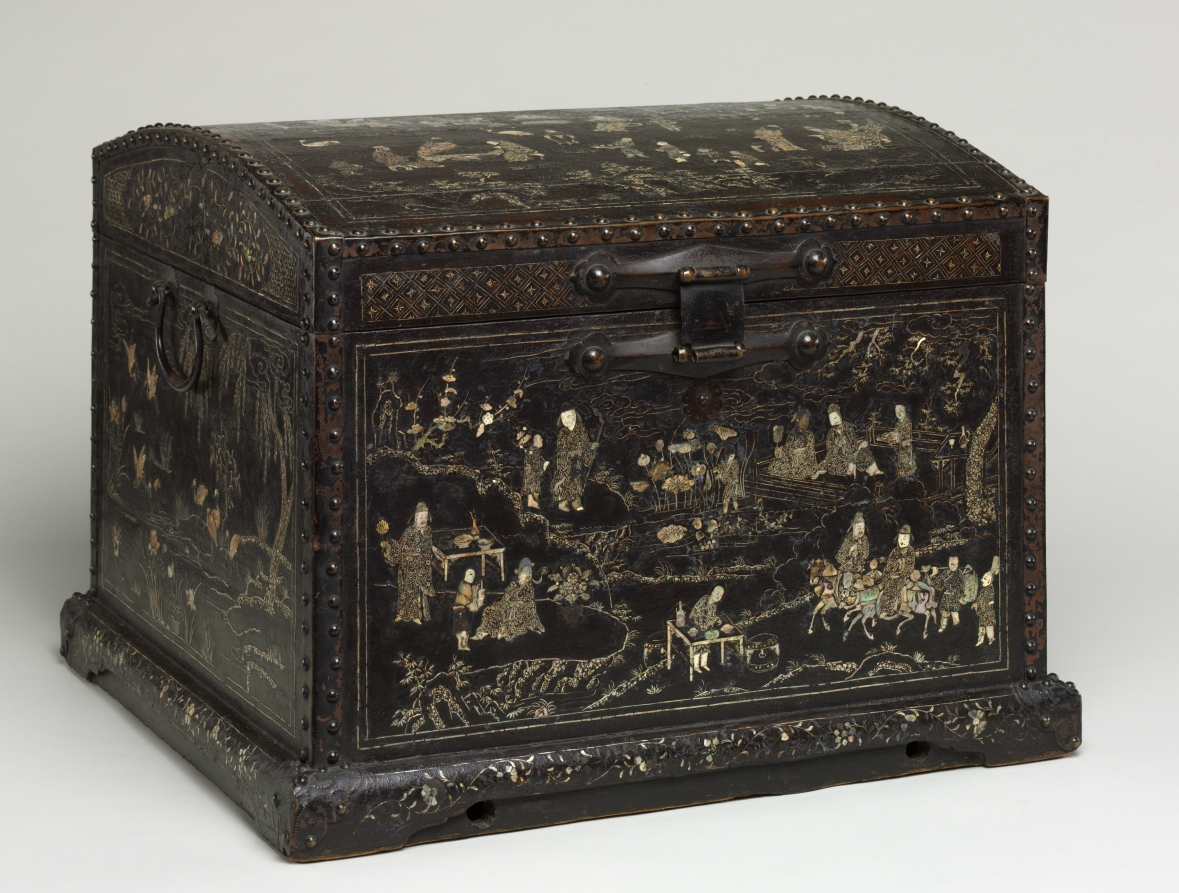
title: Chest for Storing Garments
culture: China, Ming dynasty (1368–1644)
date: 1400s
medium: lacquered wood with mother-of-pearl inlay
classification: Lacquer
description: This precious lacquer box is decorated with bird and plant motifs and figures in mother-of-pearl inlay. The decoration depicts the leisurely pursuit of scholars in nature and a garden setting. Scholars play the board game weiqi, have philosophical conversations, pluck a qin (a zither-like instrument with strings), and read books. Lacquer chests of this type were used to store garments neatly folded along their straight seams. The mother-of-pearl inlay from shells is a technique that was typically practiced by craftsmen in Hangzhou and other parts of southeast China near the sea.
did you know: Lacquer chests of this type were used to store garments.